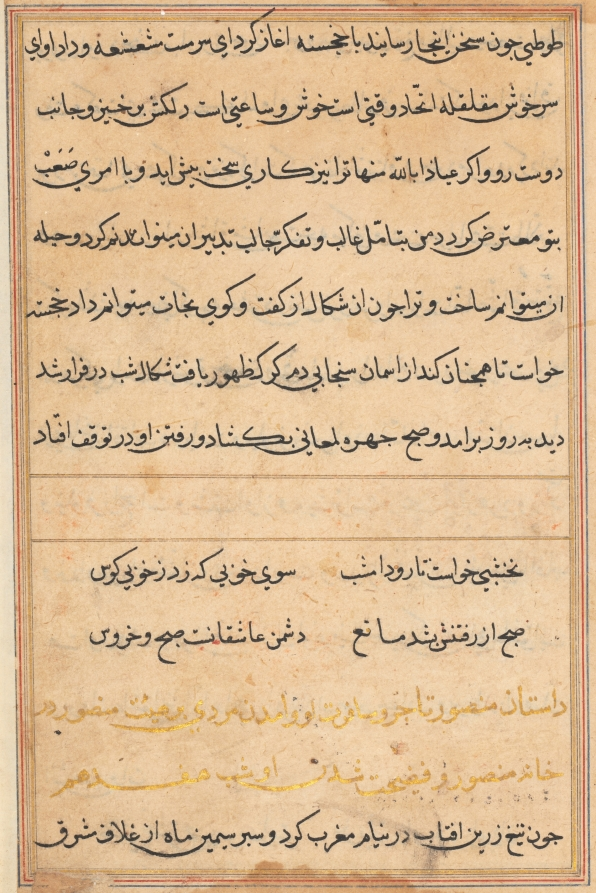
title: Page from Tales of a Parrot (Tuti-nama): text page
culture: Mughal India, court of Akbar (reigned 1556–1605)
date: c. 1560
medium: gum tempera, ink, and gold on paper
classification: Painting